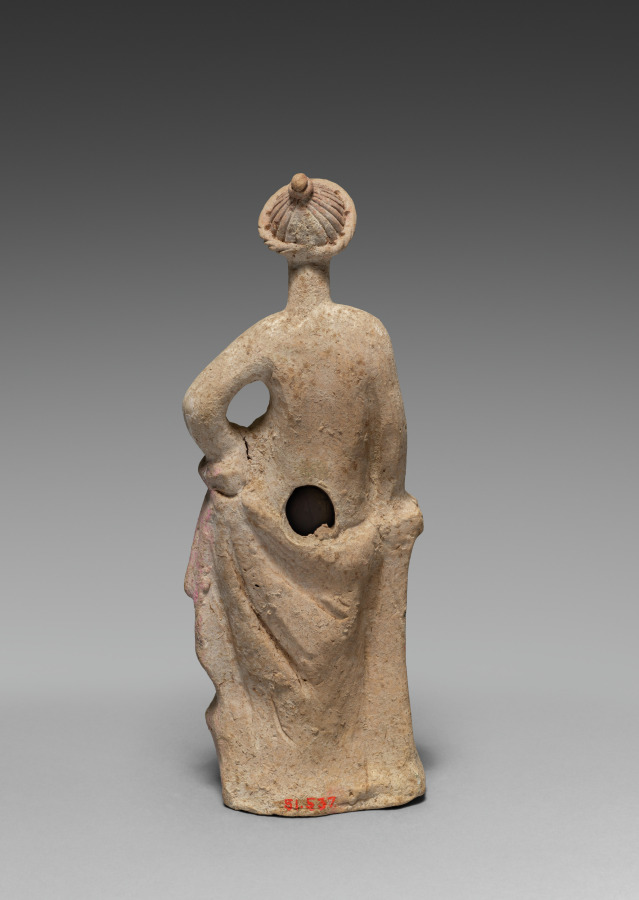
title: Figurine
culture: Greece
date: 300–100 BCE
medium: terracotta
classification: Sculpture